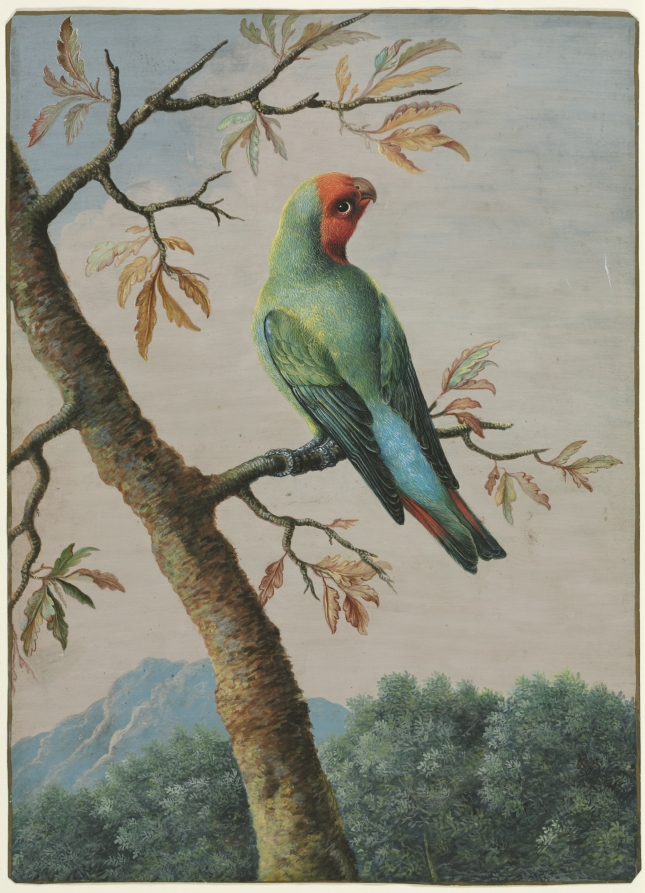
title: Bird Study: Rosy Faced Love Bird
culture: England, 18th century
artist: George Edwards (British, 1694–1773)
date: c. 1714–73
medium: watercolor with gouache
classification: Drawing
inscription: Label: Bequest of Mrs. Severance A. Millikin